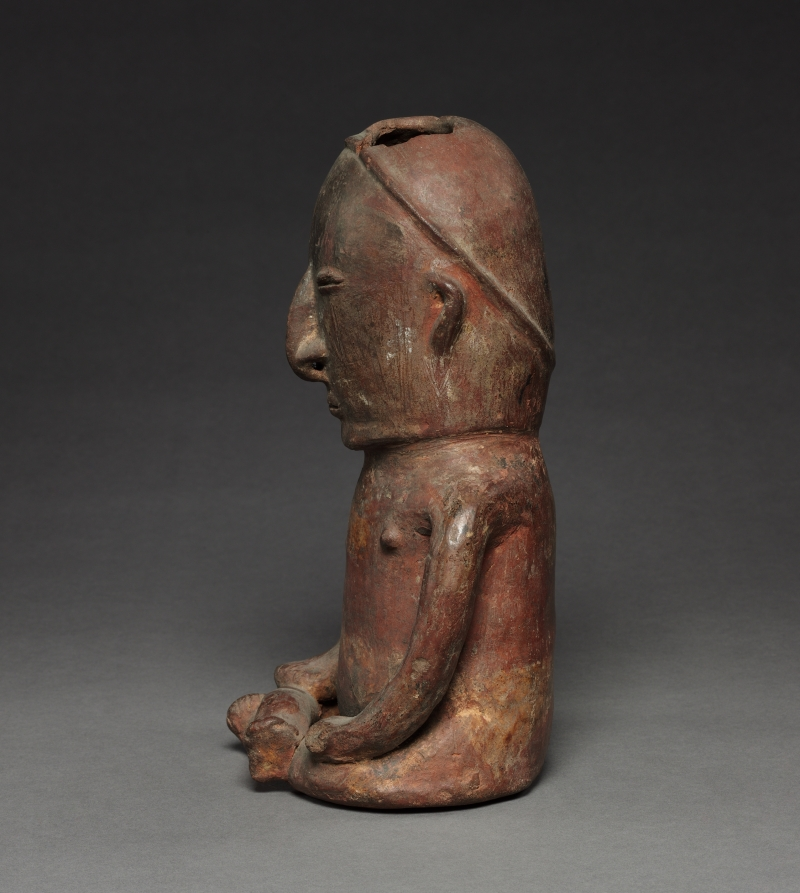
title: Seated Figure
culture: Colombia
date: before 1921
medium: red ware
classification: Ceramic